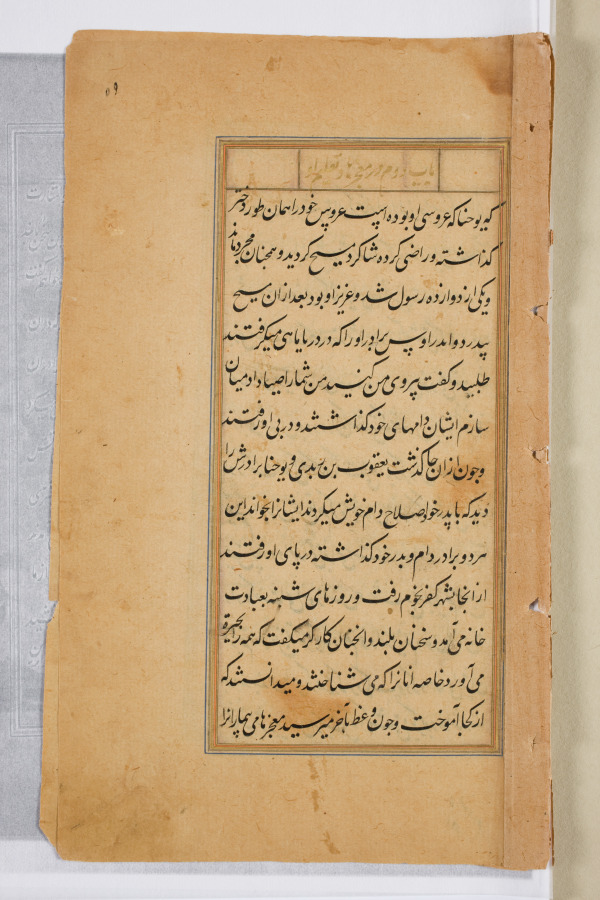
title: Text page from a Mirror of Holiness (Mir’at al-quds) of Father Jerome Xavier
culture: Mughal India, Allahabad, made for Prince Salim (1569–1627)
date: 1602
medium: Ink and gold on paper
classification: Manuscript